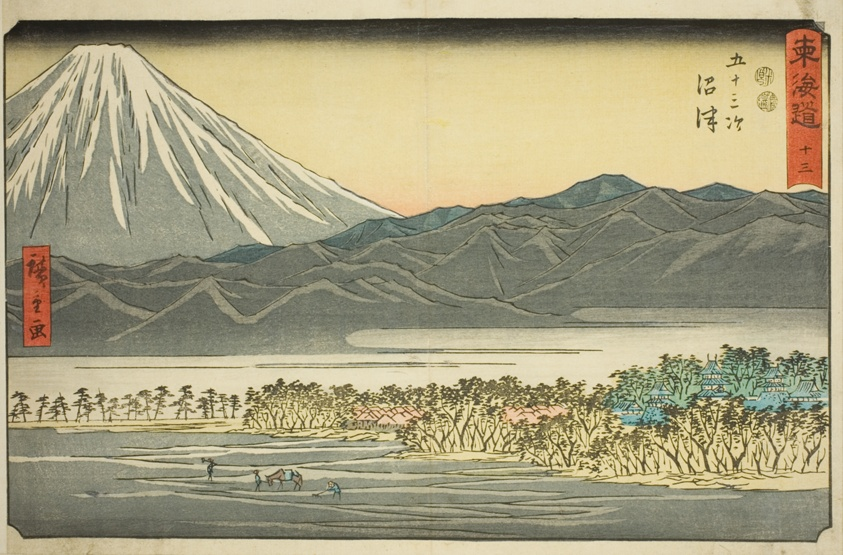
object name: Print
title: Numazu—No. 13, from the series "Fifty-three Stations of the Tokaido (Tokaido gojusan tsugi)," also known as the Reisho Tokaido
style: Japanese (culture or style)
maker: Utagawa Hiroshige 歌川 広重; Japanese, 1797-1858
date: c. 1847/52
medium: Color woodblock print; oban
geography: Japan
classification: woodblock print; print; asian art